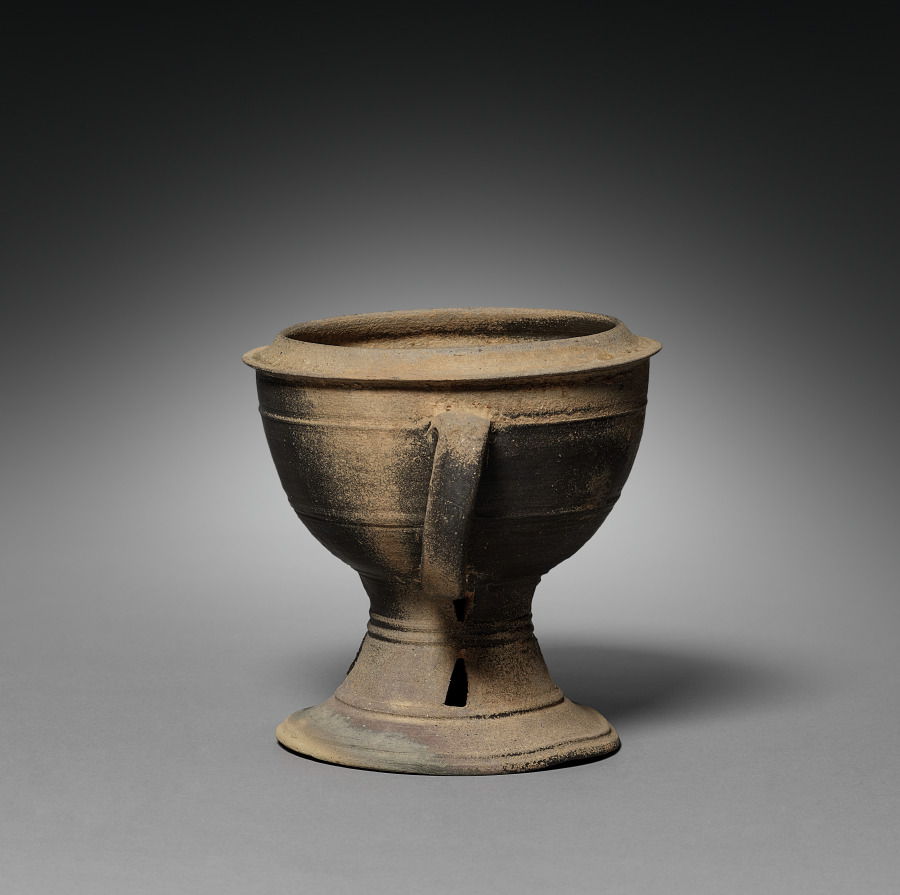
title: Lidded Cup with Strap Handles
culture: Korea, Gaya period (42–562 CE)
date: 300s–400s CE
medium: stoneware with natural ash glaze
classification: Ceramic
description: Pottery vessels with a footed stand such as this one is the earliest known high-fired ware. Its gray color is the result of the reduction of oxygen in the closed kiln chamber. Footed vessels were not for everyday usage, but rather served to present offerings to the deceased.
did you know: A series of triangular cutouts shown on the bottom are standard features of Kaya pottery.